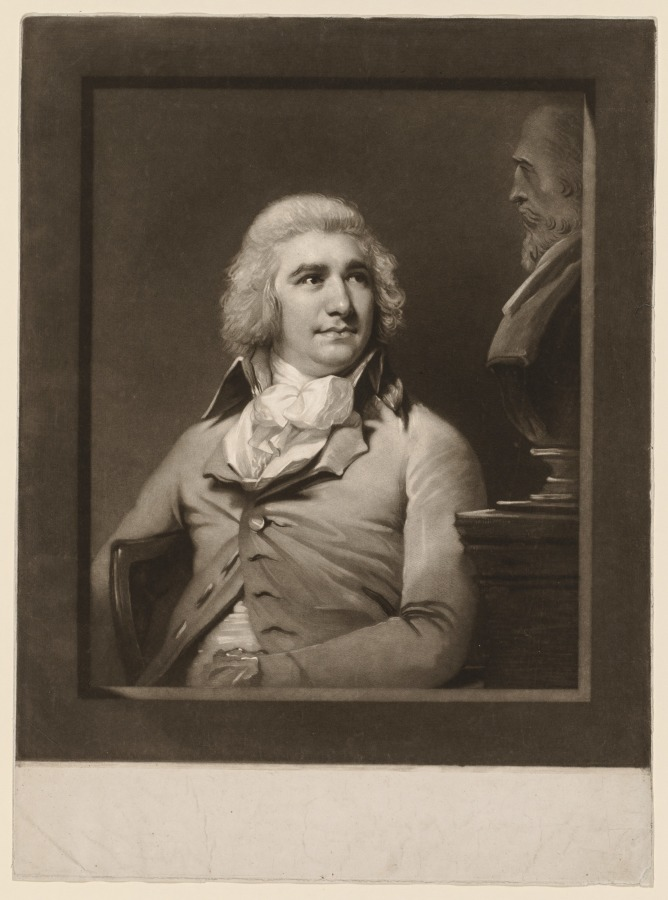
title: James Heath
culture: England, 18th century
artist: John Raphael Smith (British, 1752–1812)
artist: after Lemuel Francis Abbott (British (modern), 1750–1803)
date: 1796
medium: mezzotint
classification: Print